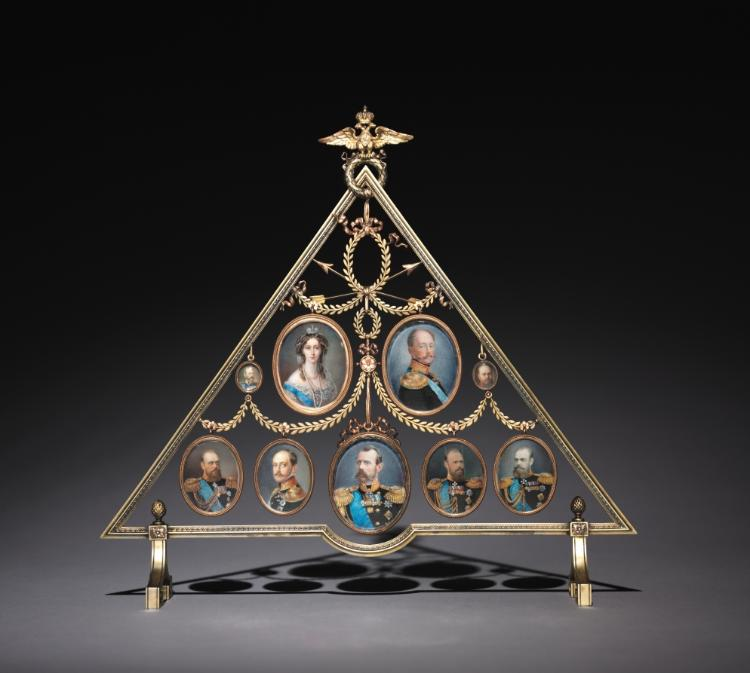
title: Framed Miniatures of the Russian Imperial Family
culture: Russia, St. Petersburg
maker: House of Fabergé (Russian, 1842–1918)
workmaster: Johan Viktor Aarne (Finnish, 1863–1934)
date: c. 1896–1905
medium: watercolor on ivory in a gold and silver gilt frame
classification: Miscellaneous